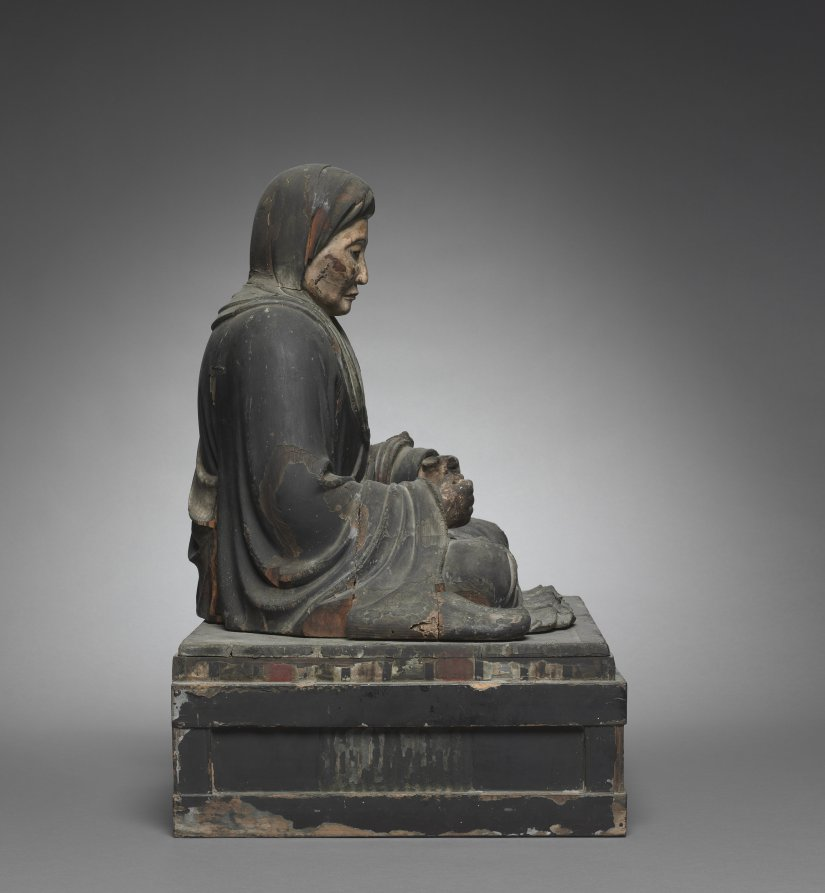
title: Portrait of the Mother of Hotto Kokushi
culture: Japan, Edo period (1615–1868)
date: 1680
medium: wood with polychromy and inlaid crystal and stone eyes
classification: Sculpture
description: This is an imaginary portrait of the mother of the Zen master Hottō Enmyō Kokushi (1203–1298), whose sculptural portrait (1970.67) can be seen in gallery 235B. That image was carved soon after the master's death. His mother's image, however, was completed several hundred years later, so the likeness is doubtful.